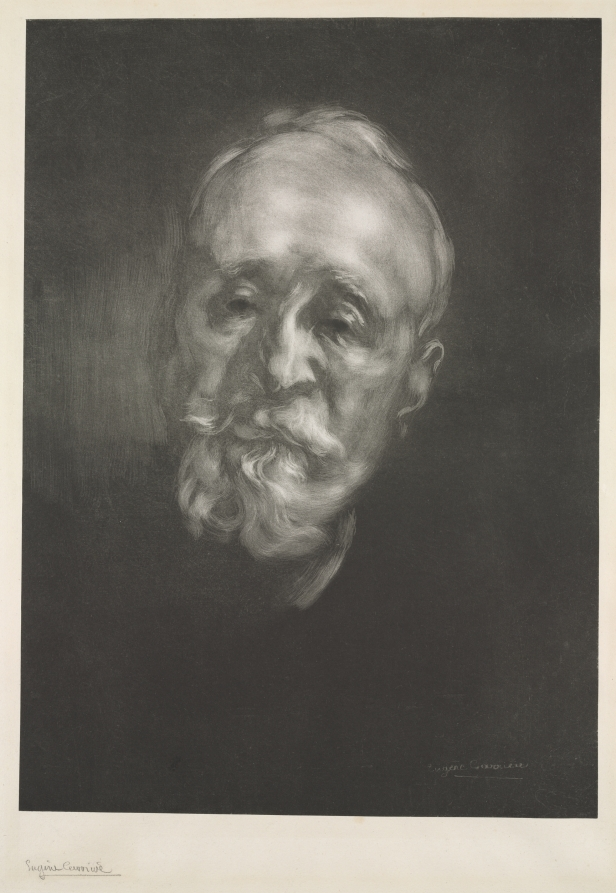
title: Puvis de Chavannes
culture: France, 19th century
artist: Eugène Carrière (French, 1849–1906)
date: 1897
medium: lithograph on chine collé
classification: Print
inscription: lower left margin: signed in pencil, "Eugene Carriere"